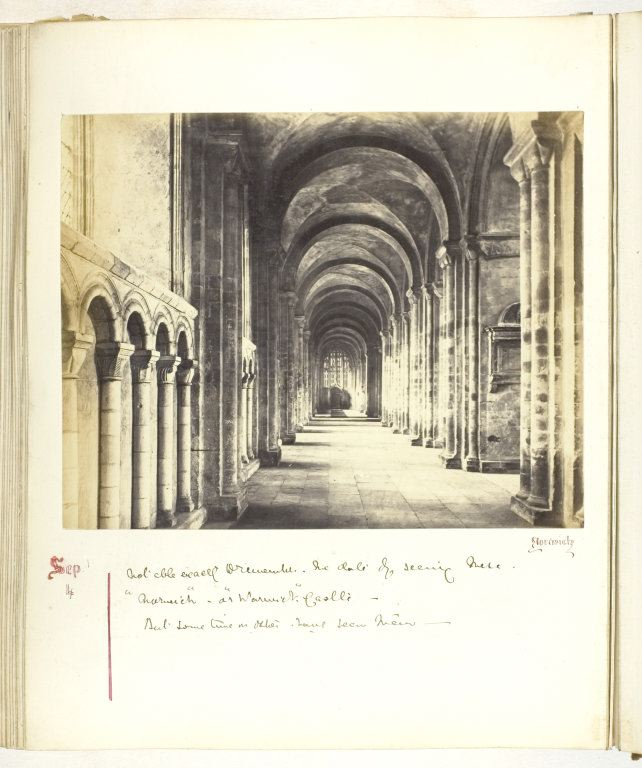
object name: Photograph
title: Untitled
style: 19th century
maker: Georgina Cowper, attributed; English, mid 19th century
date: 1868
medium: Albumen print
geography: England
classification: photograph; albumen silver print; photography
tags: Collected by Hugh Edwards, Untitled Album 1849-60, Auld Lang Syne